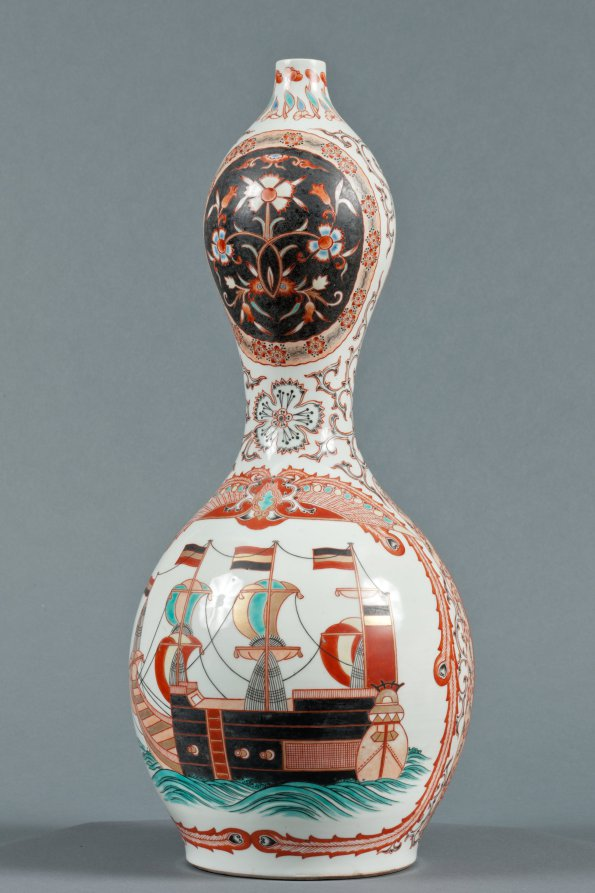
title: Bottle with Western Ships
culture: Japan, Edo period (1615–1868)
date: c. 1800–1868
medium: Porcelain with decoration in colored enamels and underglaze blue, overglaze enamels, and gold (Hizen ware, Arita type)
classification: Ceramic